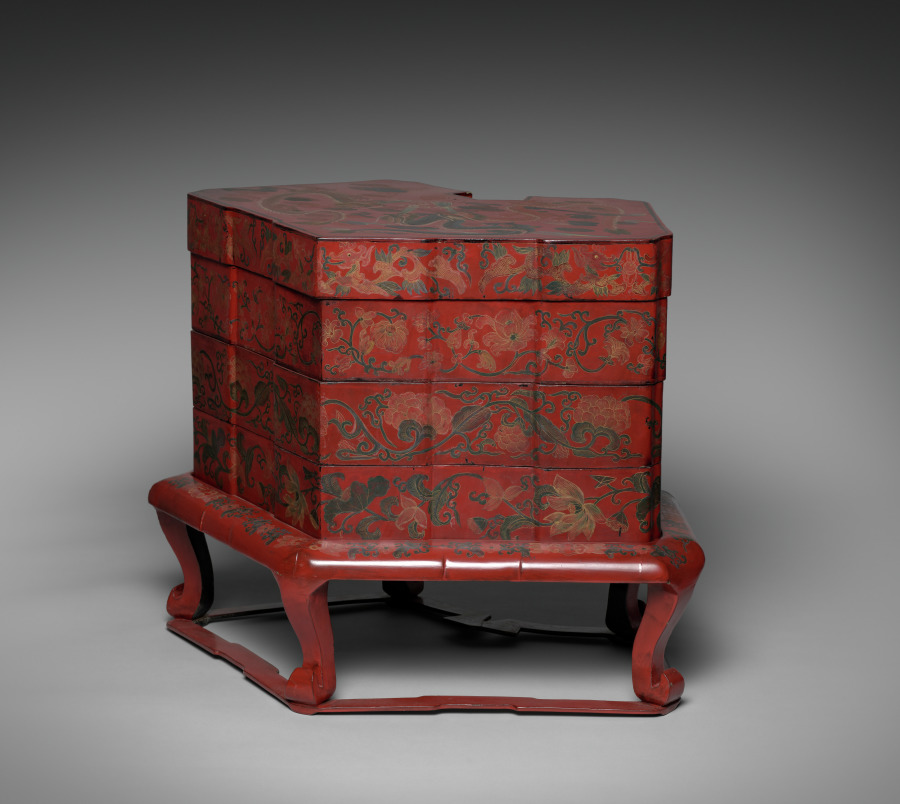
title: Tiered Food Box with Stand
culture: Japan, Edo period (1615–1868)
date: late 1700s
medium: red lacquer over a wood core, with litharge painting and engraved gold designs (Ryukyuan)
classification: Lacquer